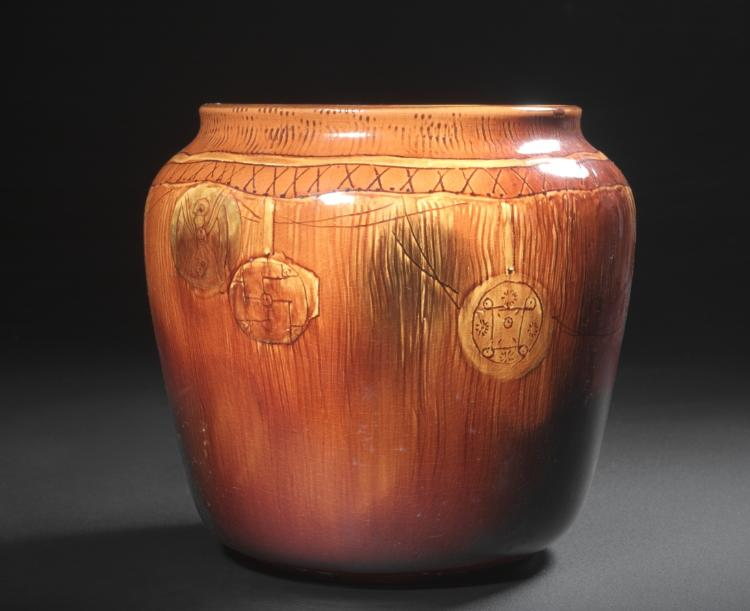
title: Vase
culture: America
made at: Rookwood Pottery Company (American, established 1880)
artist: Artus Van Briggle (American, 1869–1904)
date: 1888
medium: stoneware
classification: Ceramic